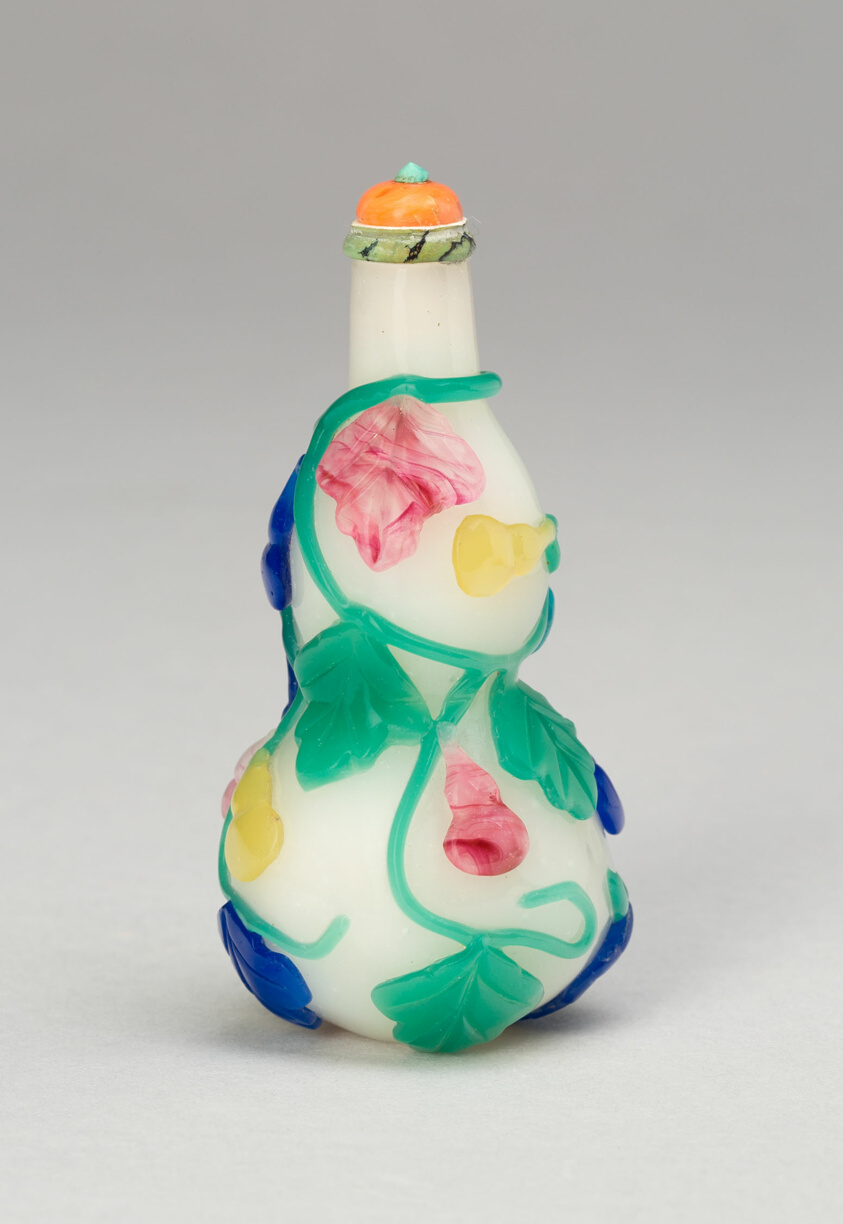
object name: Vessel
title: Gourd-Shaped Snuff Bottle with Trailing Vines and Gourds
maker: China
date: Qing dynasty (1644–1911), 1780–1880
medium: Glass; multi-colored slip-trailed overlay on white ground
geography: China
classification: snuff bottle; asian art; vessel